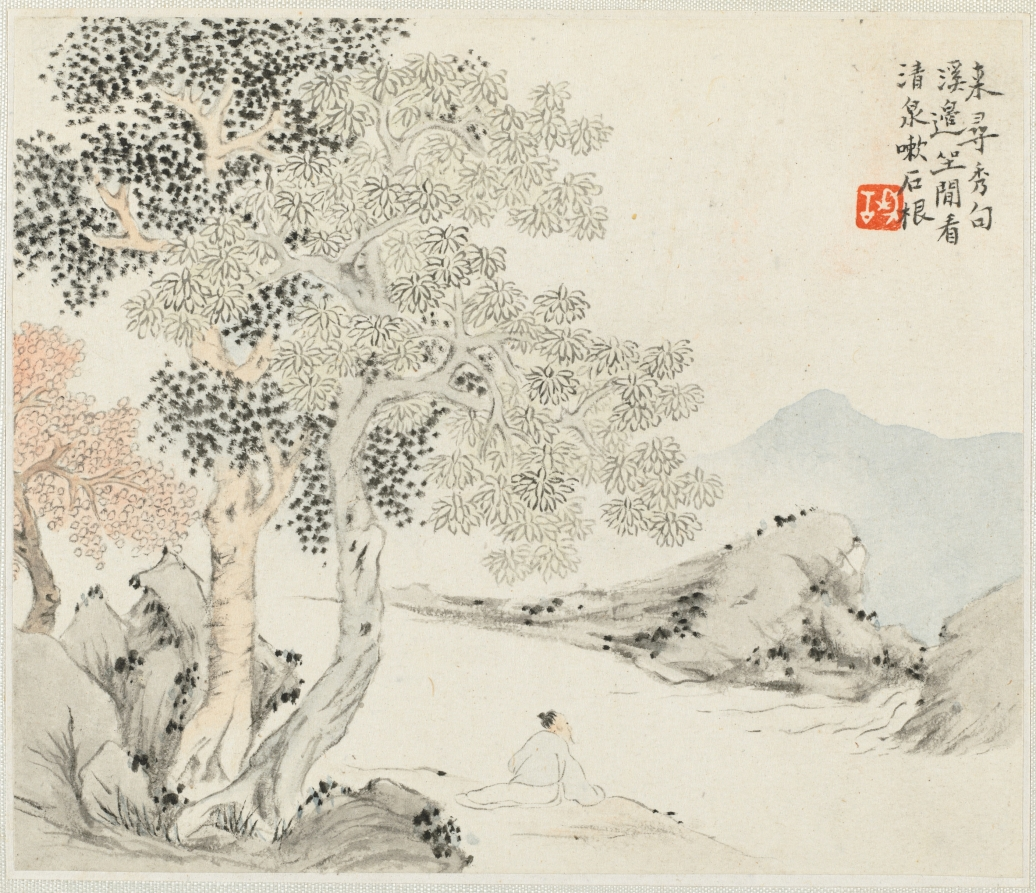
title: Album of Landscape Paintings Illustrating Old Poems: Three Big Trees, a Stream with an Old Man Sitting on the Bank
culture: China, Qing dynasty (1644-1911)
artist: Hua Yan (Chinese, 1682–c. 1765)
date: 1745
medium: album leaf, ink and light color on paper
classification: Painting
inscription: Coming and sitting down on the bank, I want to find some nice words for my poem. I watch the clear water washing the root of the stones. not signed, with a seal of the artist.